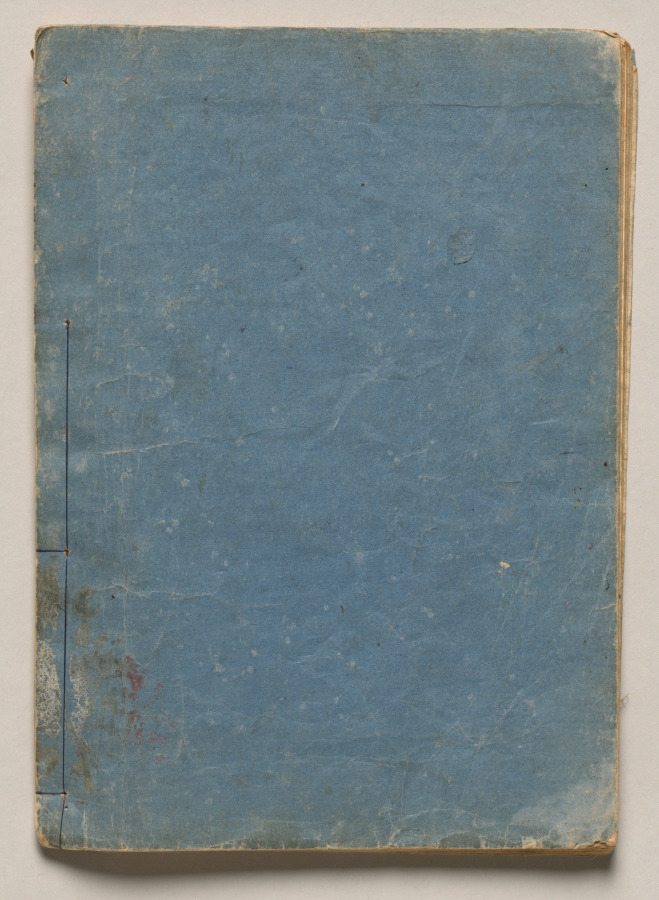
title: Volume Two of People of Japan in Light Verse (Kyōka)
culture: Japan, Edo period (1615–1868)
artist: Utagawa Hiroshige (Japanese, 1797–1858)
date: 1857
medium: Woodblock-printed book; ink and color on paper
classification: Bound Volume